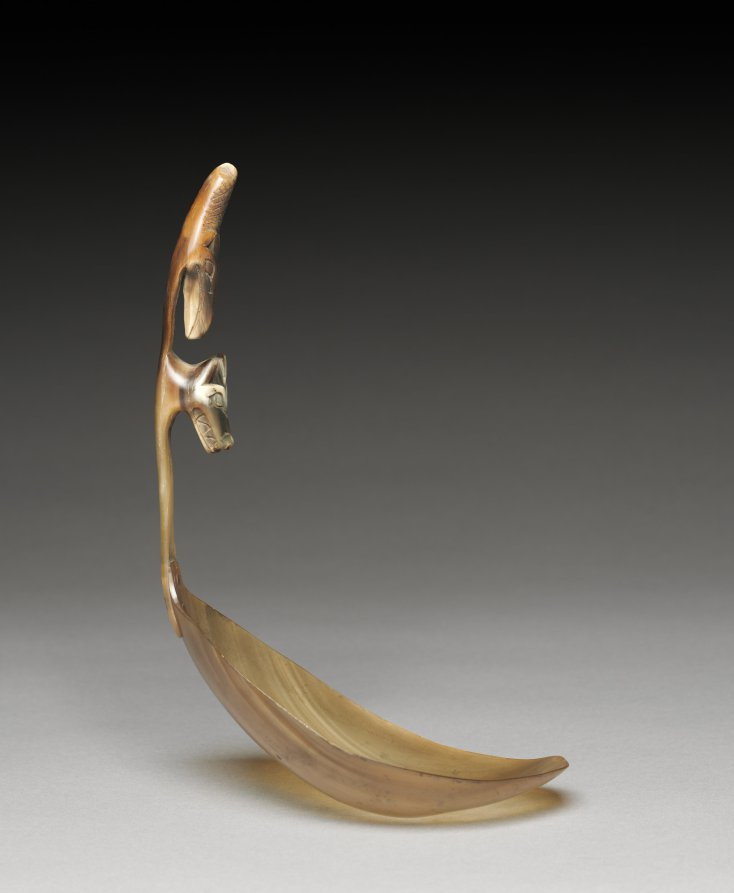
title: Spoon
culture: Native North America, Northwest Coast, Alaska, Tlingit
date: late 1800s–early 1900s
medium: horn, copper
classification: Sculpture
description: Elaborate utensils, valuable possessions of Northwest Coast noble clans, were used during potlatch feasts. This spoon’s handle features the heads of a wolf and a raven along with a beaver’s tail. All may be crests, motifs that, like European heraldry, were exclusive to important families and referred to their histories and rights to control land and resources.